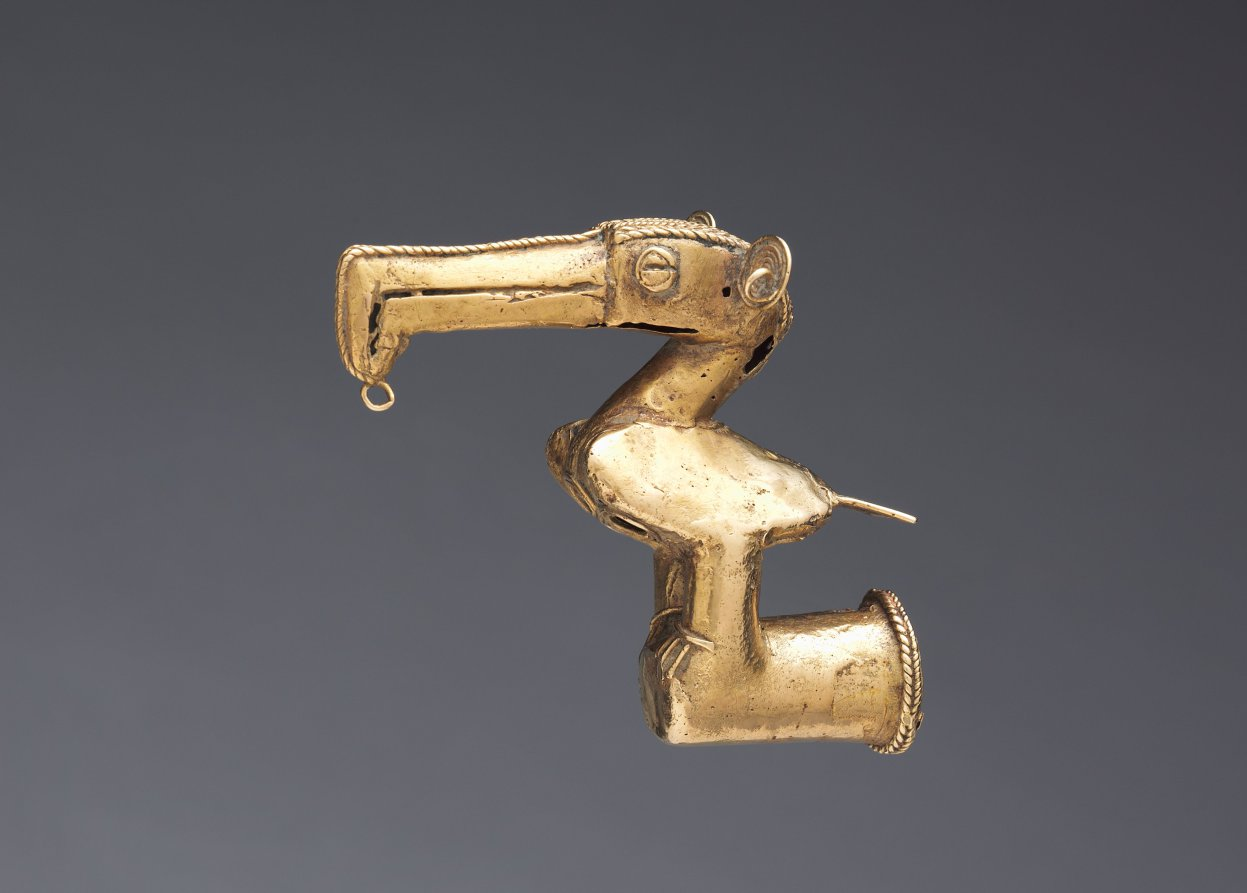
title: Staff Head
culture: Colombia, Sinú style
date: 400–1000 CE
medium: cast gold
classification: Metalwork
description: These finials probably fit over the ends of wooden staffs, emblems of rank. Unique to the Sinú area are finials with an image, often a bird, at a right angle to the base. This orientation suggests that the finials served as the finger grips of ceremonial spear throwers.